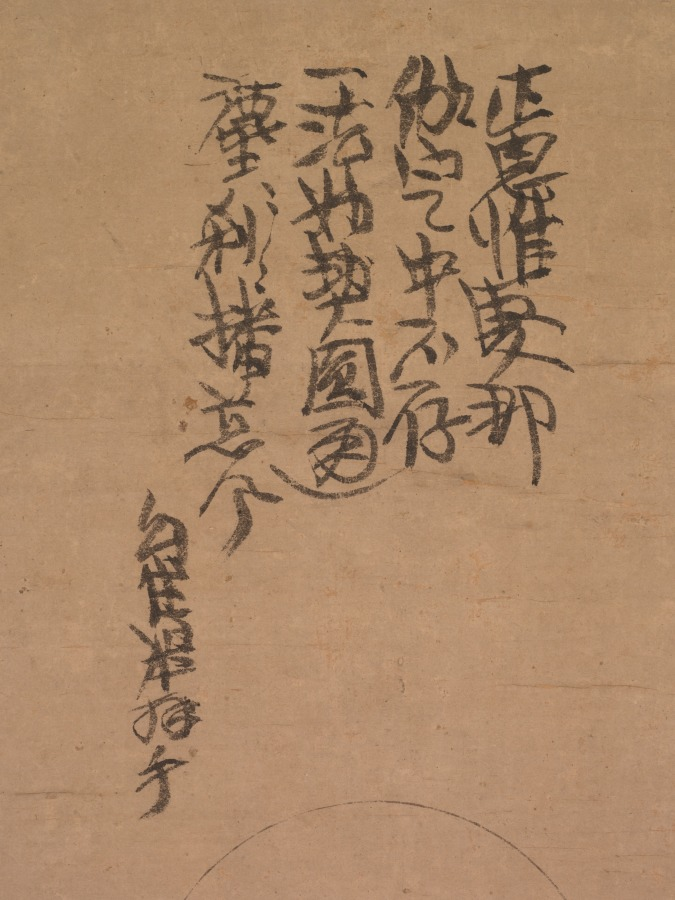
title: White-Robed Guanyin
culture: China, Yuan dynasty (1271-1368)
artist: Jueji Yongzhong (Chinese, active around 1300)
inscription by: Zhongfeng Mingben (Chinese, 1263–1323)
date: late 1200s–early 1300s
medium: hanging scroll; ink on paper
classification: Painting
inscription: Artist's signature: Huanzhu Yongzhong. Inscription by Zhongfeng Mingben: The right thinking [Samkalpa] is embodied within His deep meditation on the Buddha [naga-samadhi]. Retaining not even one single object of thought, A perfect harmony was wonderfully achieved. In the endless time and space, His all-embracing compassion prevails. [signed] Mingben of Huanzhu paying his respects.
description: Guanyin, the bodhisattva of infinite compassion (Avalokiteshvara, in Sanskrit), reveals himself in many forms. According to Buddhist belief, one such manifestation is the white-robed Guanyin sitting on a rock on the island of Putuo (Potalaka, in Sanskrit), located along the coast not far from Ningbo, in Zhejiang Province, China. Here, the figure was swiftly drawn in only a few ink lines. The inscription above is by Zhongfeng Mingben, perhaps the most widely respected and influential Chan (Zen in Japanese) master in the Yuan dynasty. The artist’s signature is a single line below on the left: Huanzhu Yongzhong.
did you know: The CMA collection includes a drawing by a Japanese priest, CMA 1978.47.2, inspired by this composition.